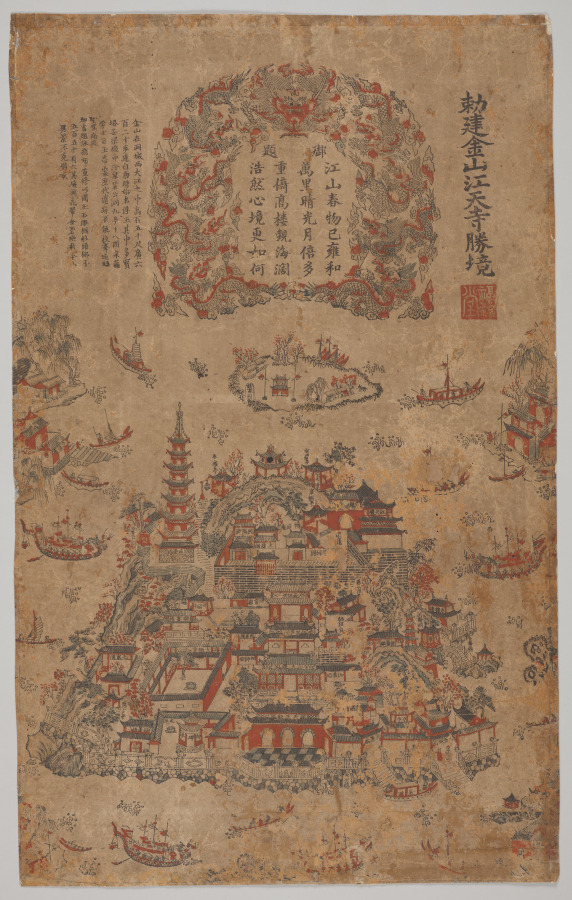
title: Scenic Spots of Jiangtian Temple on Jinshan, Built by Imperial Command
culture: China, Qing dynasty (1644–1911), Kangxi reign (1622–1722)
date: 1662–1722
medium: Polychrome woodblock print; ink and color on paper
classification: Print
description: In the 1600s, printing flourished in such Jiangnan cities as Nanjing, Suzhou, Hangzhou, and Huizhou, evolving from privately enjoyed illustrated books printed in color to more commercialized single-sheet color prints that were hung on walls and became part of the rich urban visual culture.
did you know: Woodblock printing in color reached a height in China in the 1600s to 1700s. The prints were executed by means of sets of separate blocks, each carved to print a different color.